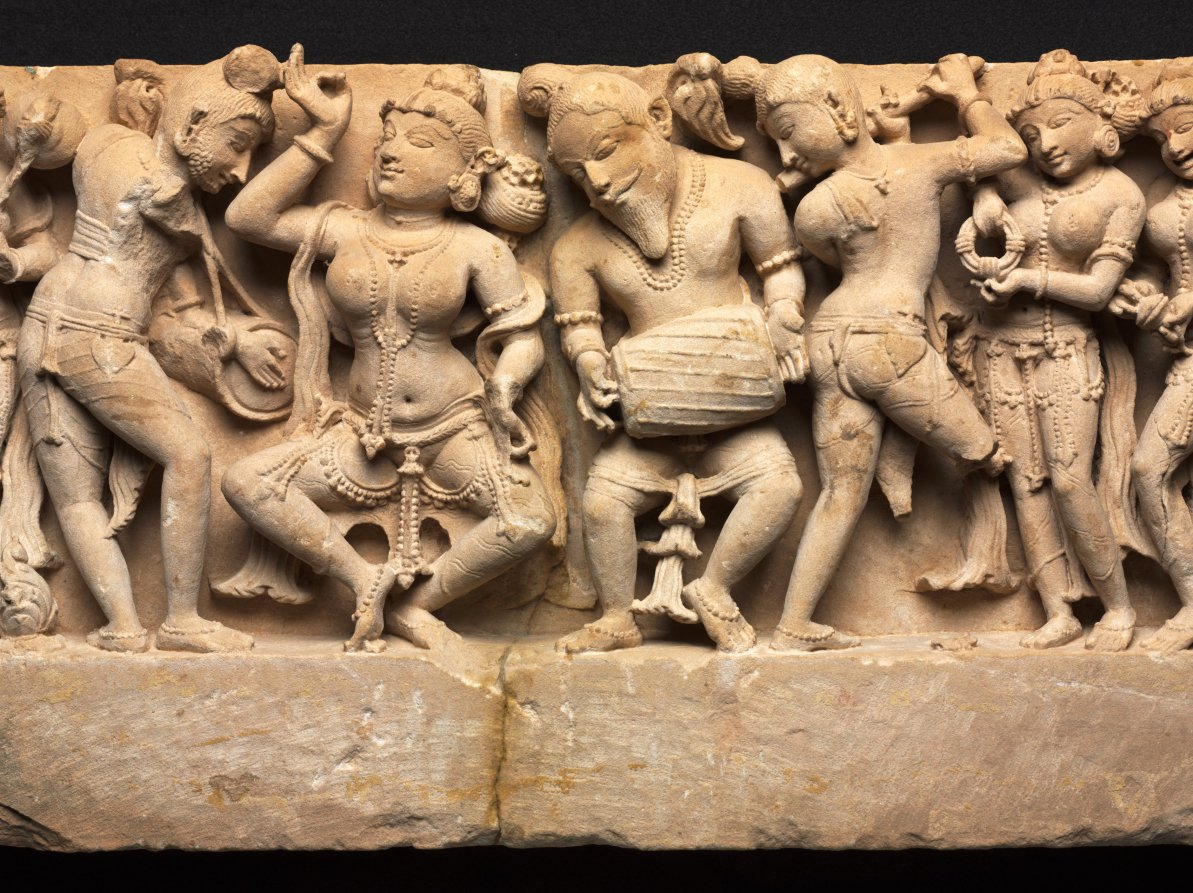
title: Frieze with Dancer and Musicians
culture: Northwestern India, Rajasthan, Sikar, Harshagiri, 10th century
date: c. 973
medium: sandstone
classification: Sculpture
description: A dancer, who strikes a pose in the center, is accompanied by a full orchestra of musicians in lively variegated poses. At the far left, a woman plays the cymbals, her mouth open in song. Twisting turning postures of figures wrought in high relief with little background space behind them are characteristics of Indian sculpture from the medieval period. Music and dance were important components of devotional temple activities; they were considered as pleasing to the divinity and attractive for devotees as the works of sculpture and architecture.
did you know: The twisting, dynamic postures of the musicians in this frieze may visually echo the joyful music they are playing together.